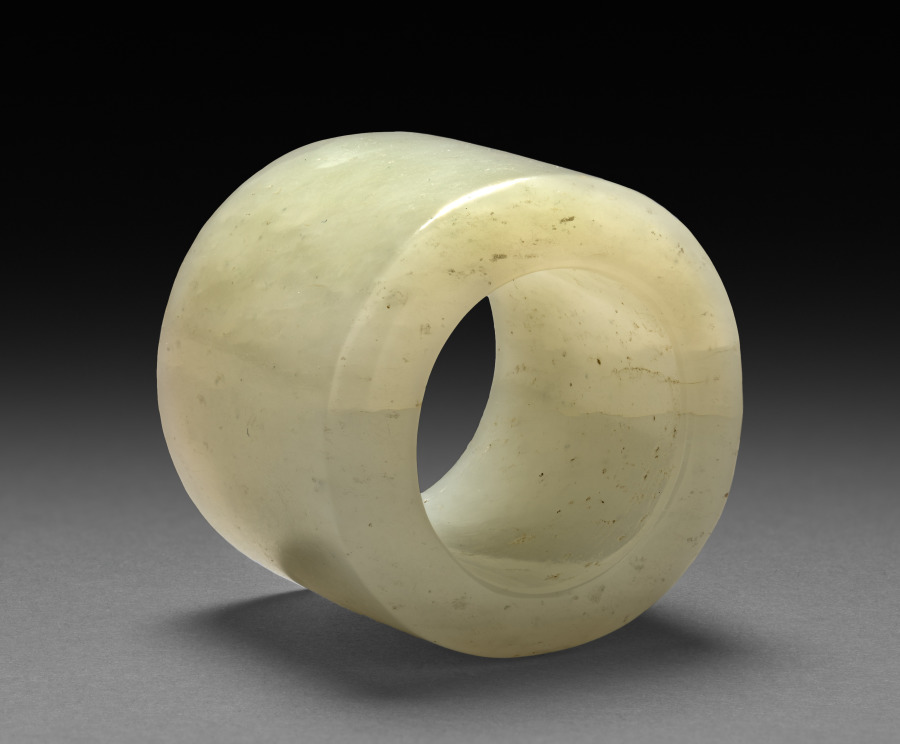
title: Thumb Ring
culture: China, Qing dynasty (1644–1911), Qianlong reign (1736–95)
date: 1736–95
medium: white jade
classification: Jade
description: Jade rings were worn by men on the thumb of the right hand to assist with holding and pulling the string of the archer’s bow. However, thumb rings were also fashionable accessories for civil officials in the late Qing dynasty.